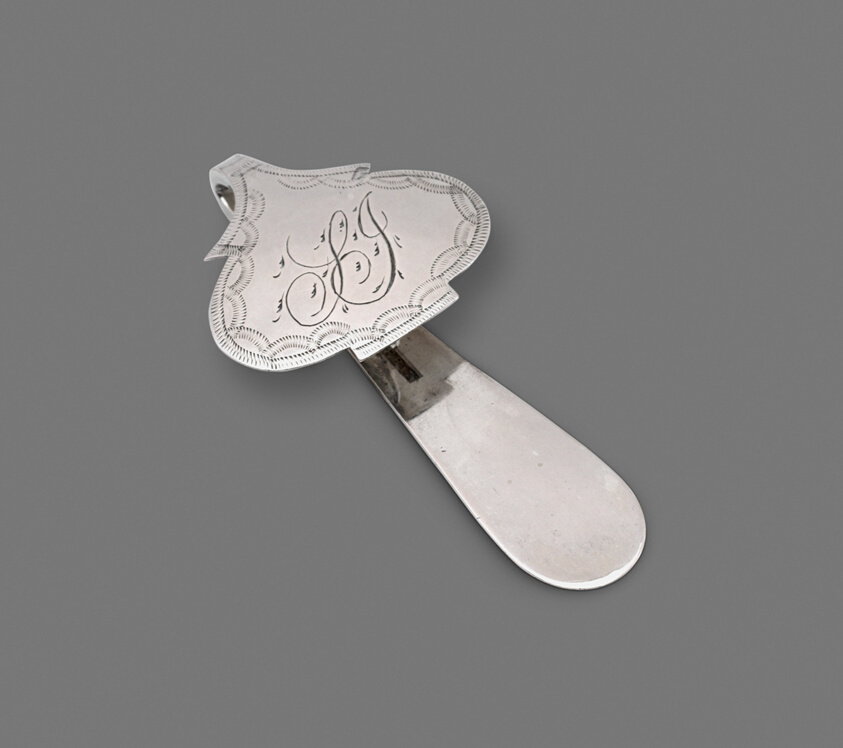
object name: Costume and Accessories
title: Chatelaine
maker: Emmor Jefferis; American, 1804–1892; Wilmington, Delaware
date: 1825–35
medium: Silver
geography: Wilmington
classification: costume accessory worn at waist or below; chatelaine; silver; american decorative arts; american arts; decorative arts